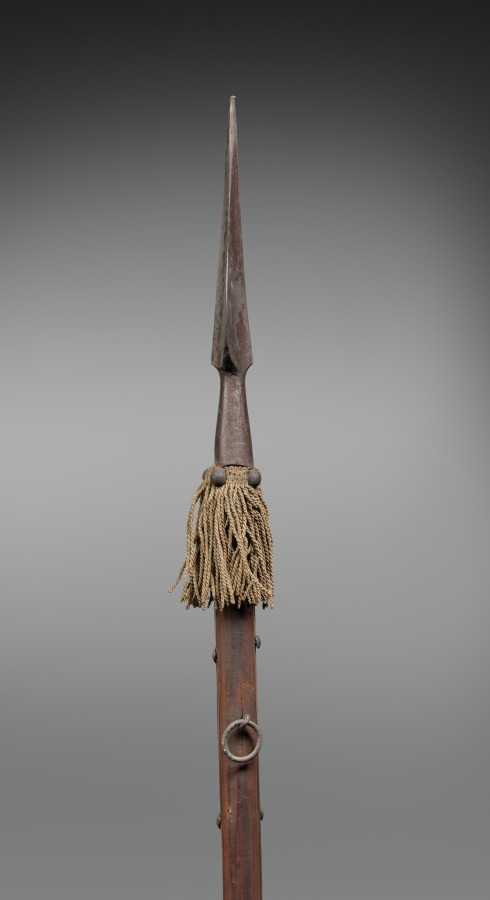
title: Banner with Medallions of Christ's Passion (pole)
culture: Spain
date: 1700s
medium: wood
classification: Arms and Armor